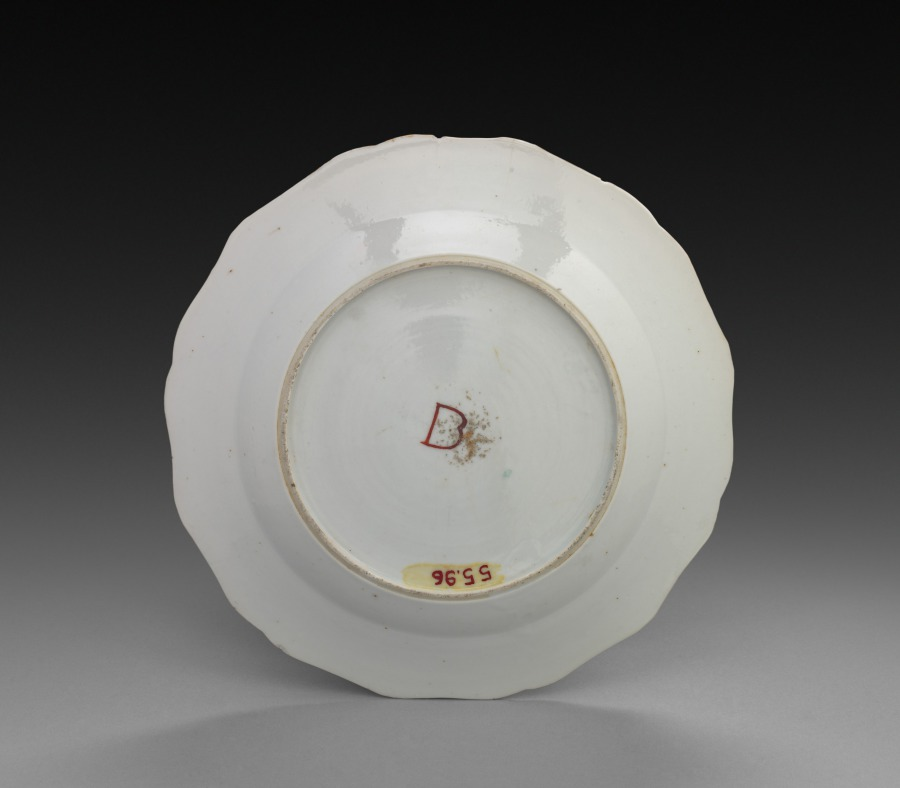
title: Dinner Plate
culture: China, Chinese Export, 18th century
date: 1760–1770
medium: porcelain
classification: Ceramic